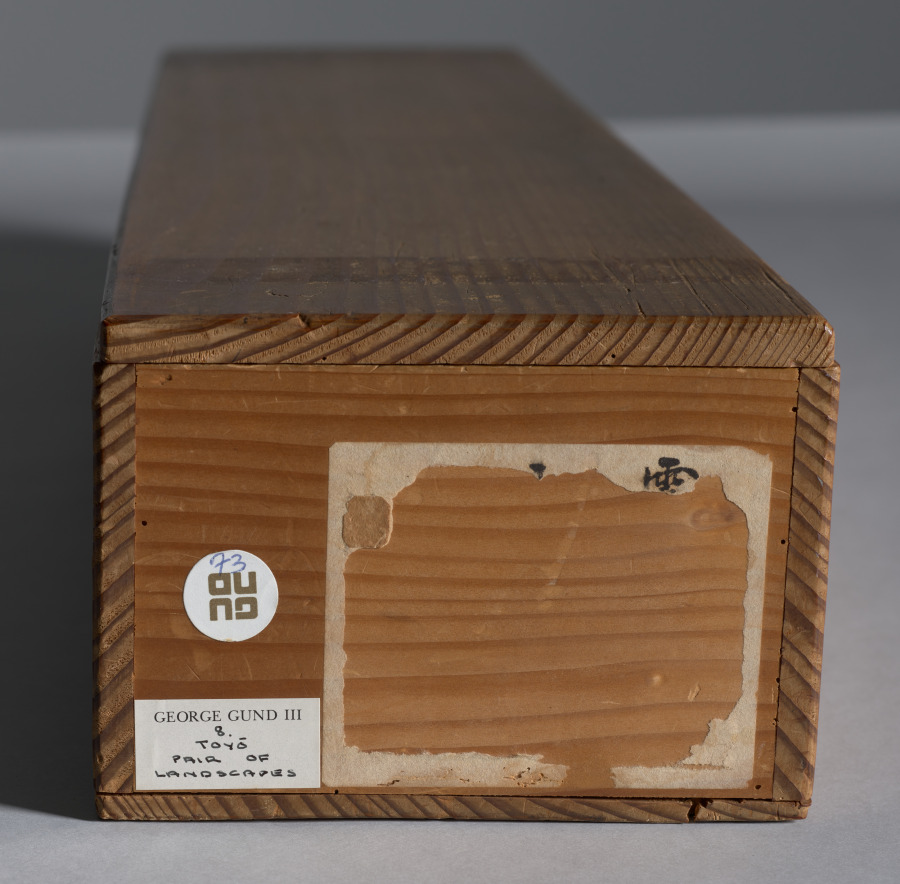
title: Landscapes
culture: Japan, Edo period (1615–1868)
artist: Unkoku Tōyo (Japanese, 1612–1688?)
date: mid- to late 1600s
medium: pair of hanging scrolls; ink and light color on paper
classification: Painting